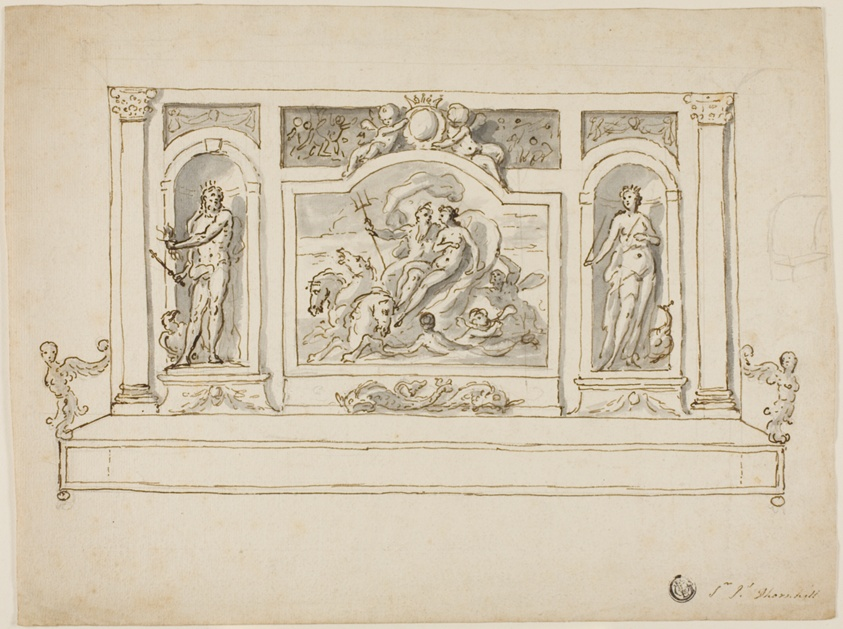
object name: Drawing and Watercolor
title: Neptune and Amphitrite Flanked by Jupiter and Juno: Design for Painted Hall or Garden Bench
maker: James Thornhill (English, 1675-1734)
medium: Pen and brown ink with brush and gray wash, over graphite, on ivory laid paper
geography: England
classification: pen and ink drawings; drawings (visual works); prints and drawing